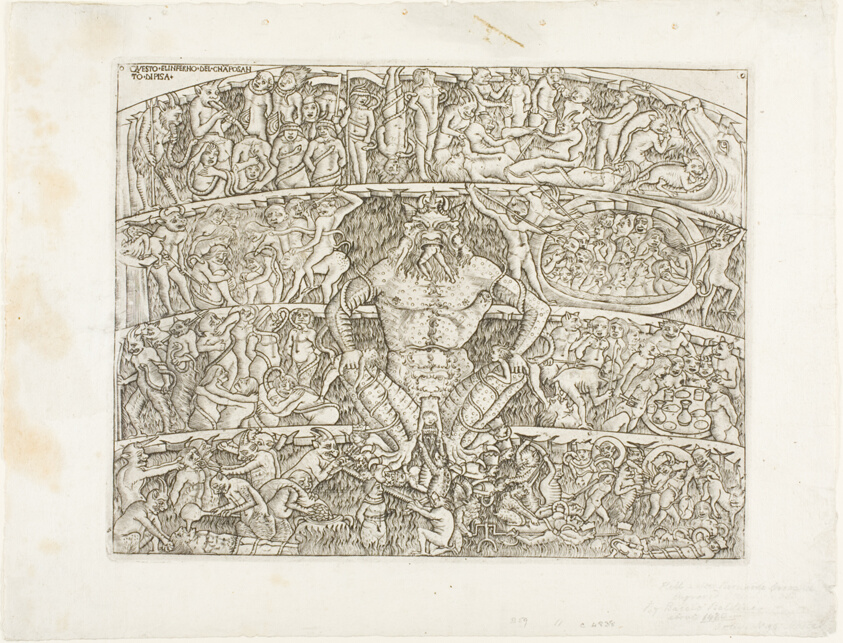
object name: Print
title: Inferno According to Dante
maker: Circle of Baccio Baldini (Italian, c. 1436–1487); after Francesco Traini (Italian, active 1321–1345)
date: c. 1470, printed 19th century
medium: Engraving in black on ivory wove paper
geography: Italy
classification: engraving; print; prints and drawing